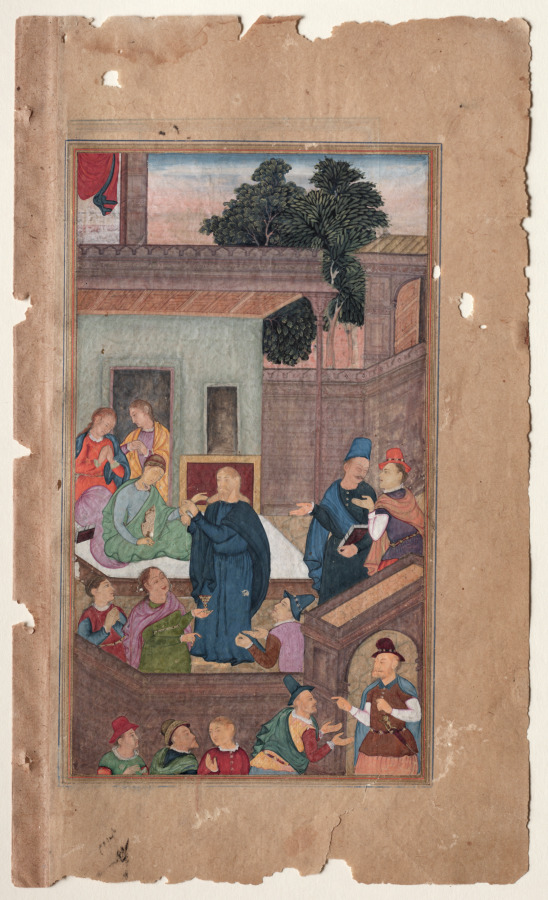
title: Jesus Raises Jairus’s Daughter from the Dead (folio 82 verso), from a Mirror of Holiness (Mir’at al-quds) of Father Jerome Xavier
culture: Mughal India, Allahabad, made for Prince Salim (1569–1627)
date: 1602–4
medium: Gum tempera, ink, color, and gold on paper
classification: Manuscript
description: Jesus gestures toward the 12-year-old girl he has awakened from the dead, in a lesser-known miracle included in Father Jerome’s text. The elder of a synagogue, the girl’s father, named Jairus, had shown great faith in Jesus and had begged him to help his daughter; Jairus may be the figure dressed as a Jesuit in a dark cloak and tall matching cap behind Jesus. Jesus admonished the crowd to tell no one about the miracle, but people turn and gesture to one another, unable to keep from spreading the news.